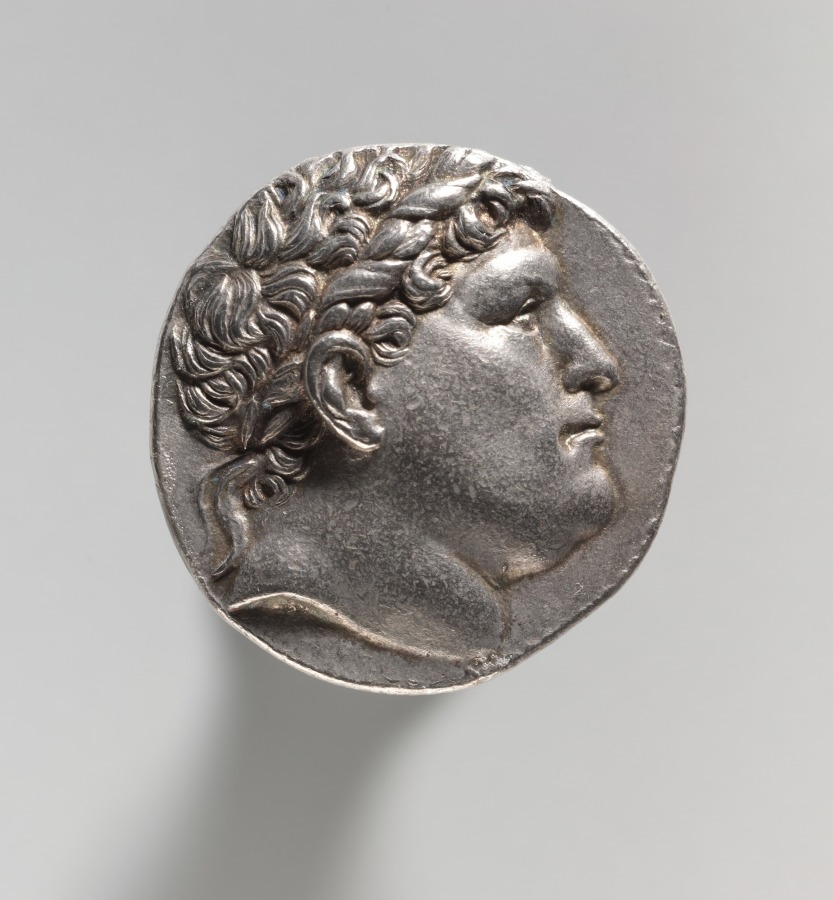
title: Tetradrachm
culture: Anatolia, Kingdom of Pergamum (281–133 BCE), Eumenes I (263–241 BCE)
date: 262–241 BCE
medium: silver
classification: Coins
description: The depictions of rulers found on this coin represents a realistic type of portraiture, similar to that found on coins in the West.